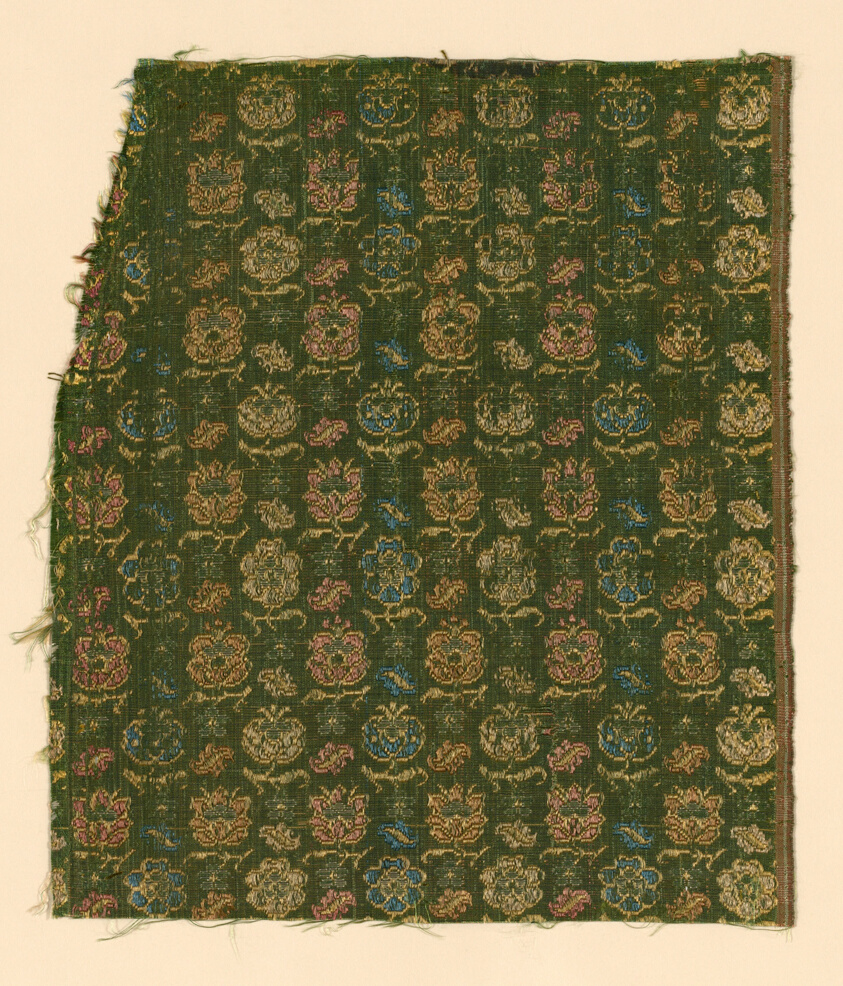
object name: Textile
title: Fragment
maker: Italy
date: 1625/75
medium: Silk and silvered-metal strip, plain weave with supplementary patterning warps, supplementary patterning wefts, and facing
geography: Italy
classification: textile; weaving